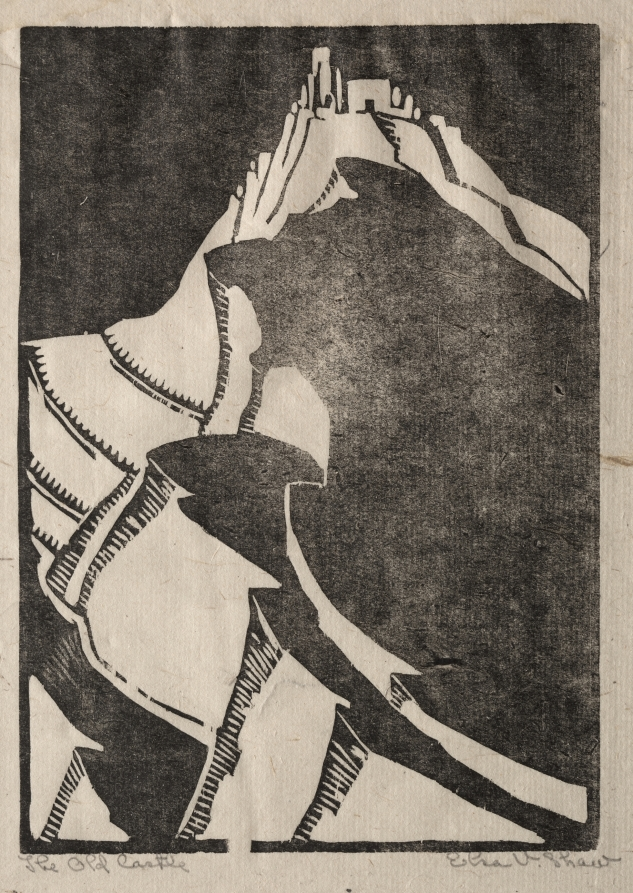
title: The Old Castle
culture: America, Ohio, Cleveland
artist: Elsa Vick Shaw (American, 1891–1974)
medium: linoleum cut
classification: Print